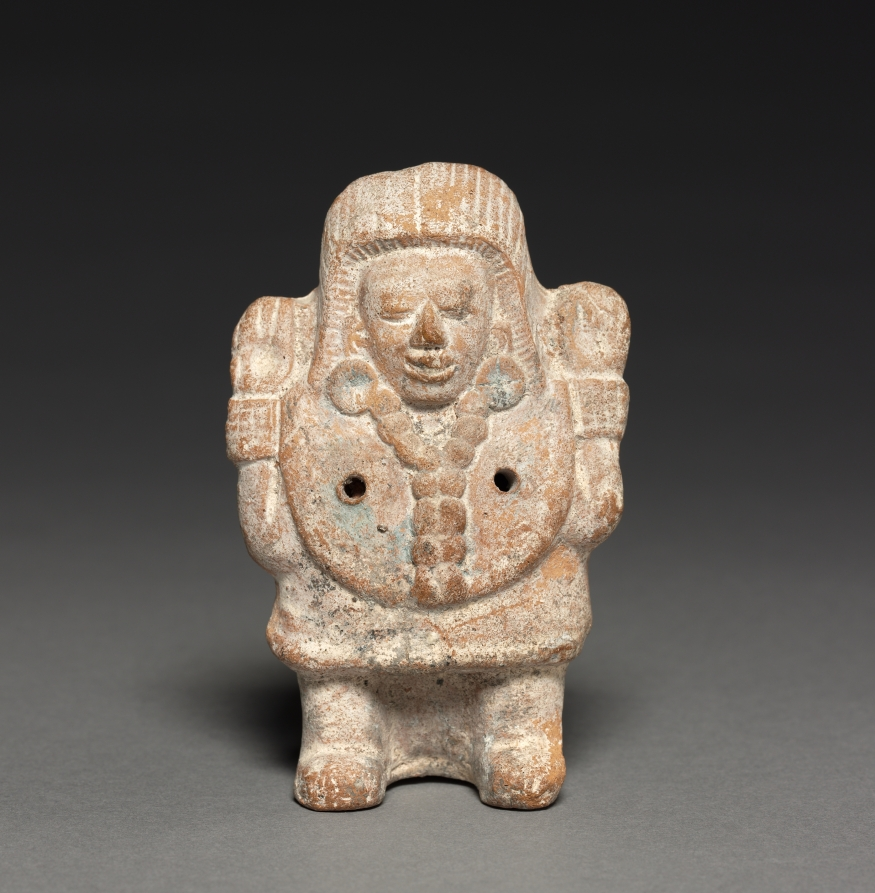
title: Female Figurine Rattle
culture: Mexico, Campeche, Jaina Island, Maya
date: 600–900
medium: Ceramic, pigment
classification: Sculpture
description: This hollow, mold-made figurine contains pellets that transform it into a rattle used as a musical instrument, perhaps during household rituals.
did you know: This hollow, mold-made figurine contains pellets that transform it into a rattle.